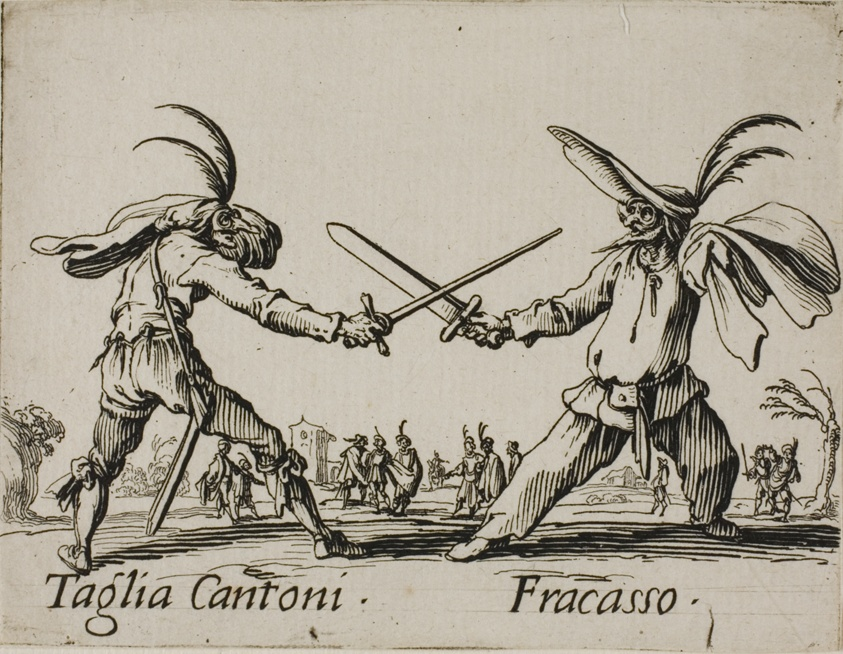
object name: Print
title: Taglia Cantoni - Fracasso, plate 24 from Balli di Sfessania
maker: Jacques Callot (French, 1592-1635)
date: c. 1622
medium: Etching and engraving on paper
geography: France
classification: etching; print; prints and drawing